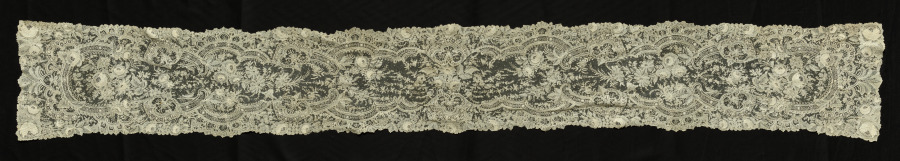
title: Lace Scarf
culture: Flanders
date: 1800s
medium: Needle lace (Point de Gaze)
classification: Lace